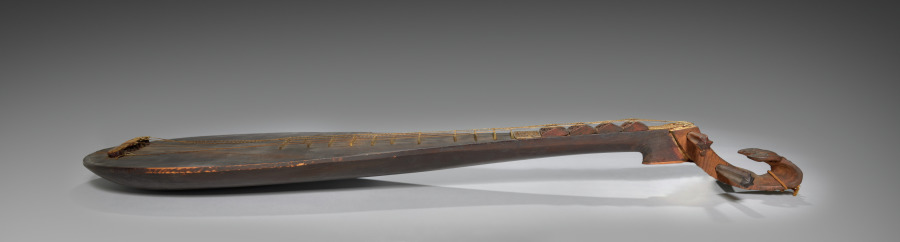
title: Pipa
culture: China, Qing dynasty (1644-1911)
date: 1800s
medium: Wood, ivory, bone, gut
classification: Musical Instrument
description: The term pipa, known since the 3rd century BC, describes the playing motion of the right hand: pi, “to play forward” (left), and pa, “to play backward” (right). A type of lute played with the fingers, it is used in opera and storytelling ensembles and has an impressive, virtuosic solo repertoire. Historic imagery, such as wall paintings, documents the spread of the pipa, along the Silk Road from western and central Asia to China. The bat finial here is a commonly used device on 19th-century Chinese lutes symbolizing good luck.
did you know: The string holder is made of bone.